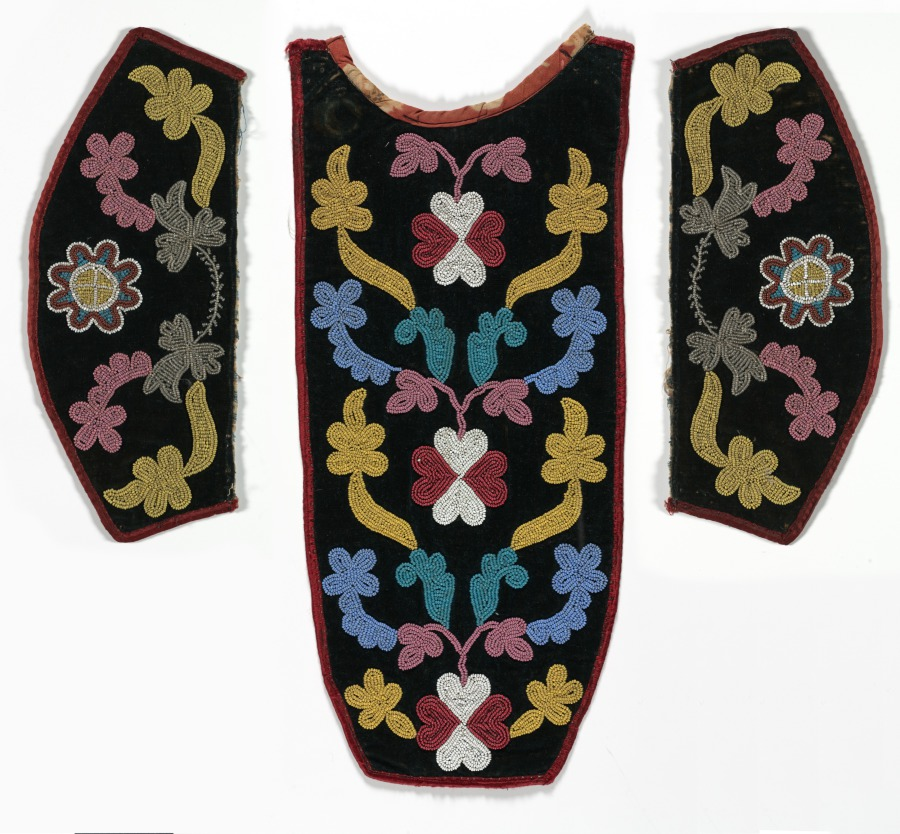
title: Placket and Cuffs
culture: Northeast Woodlands, Great Lakes Region, Anishinaabe (Ojibwe) or Nehiyawak (Cree) People?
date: late 1800s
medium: Velvet, cotton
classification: Garment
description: In the 1800s, native peoples began to use European fabrics to fashion fine formal garments; they favored sturdy cloth, such as velvet and wool broadcloth, which provided support for heavy decorative beadwork that was added by hand. Often the fabric was a dark color, providing dramatic contrast for the multicolored beads. Rather than encrusting the entire garment, beadwork was confined to cuffs, “epaulettes,” bib-like plackets and yokes, rectangular panels sewn to leggings, shirts, and dresses, and the like.